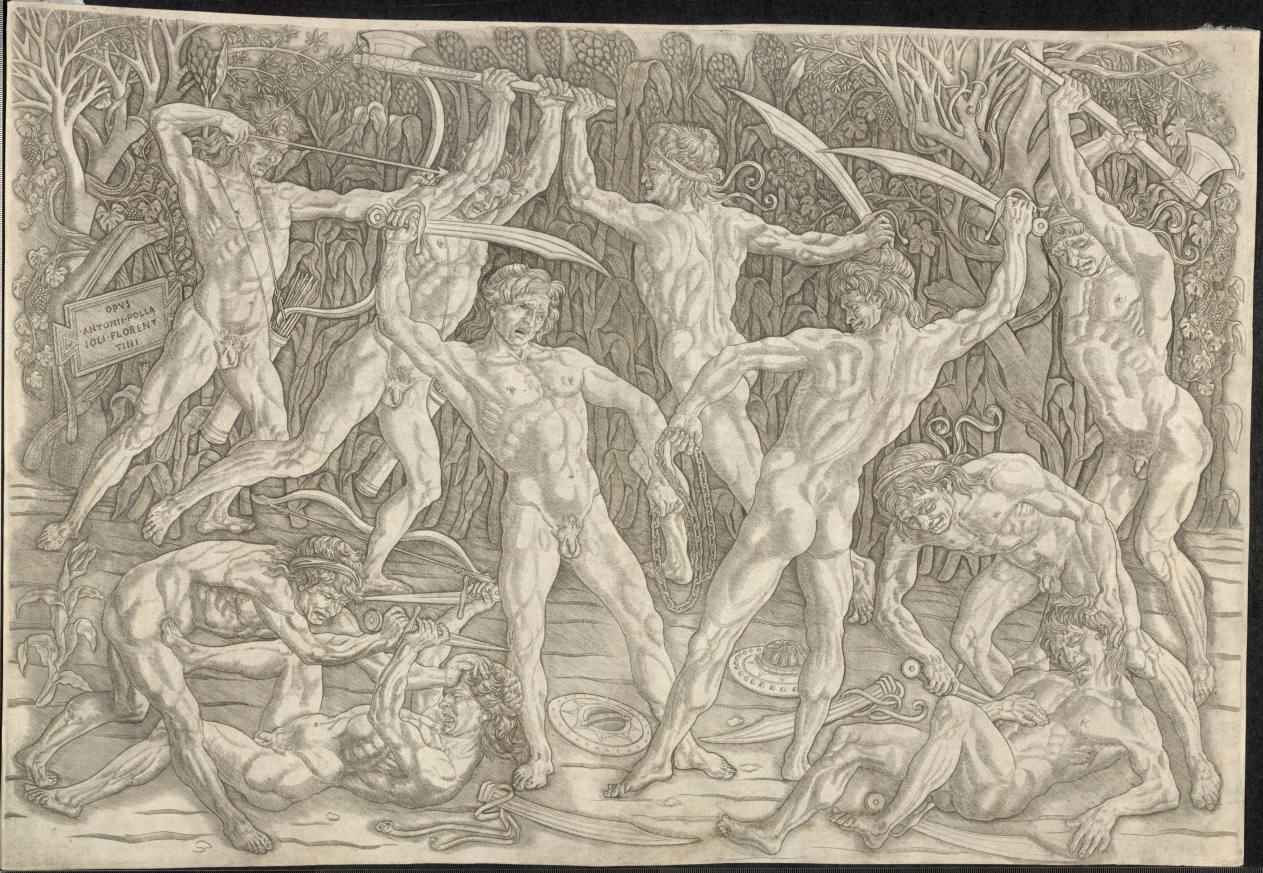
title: Battle of the Nudes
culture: Italy, 15th century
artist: Antonio del Pollaiuolo (Italian, 1431/32–1498)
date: 1470s–80s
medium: engraving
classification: Print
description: This engraving is one of the earliest Renaissance prints to portray the nude male body in action. Antonio del Pollaiuolo’s grimacing warriors appear like clones in different poses. The print may have functioned as a model for workshop apprentices studying human anatomy while learning to draw; however, the artist’s Latin signature suggests it also had an audience educated in literature. Art historians remain uncertain whether Pollaiuolo intended to depict a particular story or historical event. It is possible he created a deliberately ambiguous allegory that would appeal to patrons interested in interpreting symbols. For example, the continuous chain shared by the two central men could refer to an ancient idea that the body is the chain of the soul, only to be released in death.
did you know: Considered a groundbreaking work in the history of the Italian Renaissance, the CMA holds the only known impression of the print's first state.